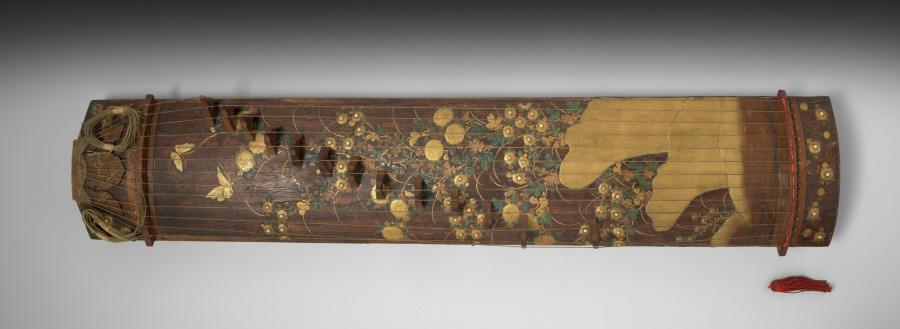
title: Koto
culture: Japan, Edo period (1615–1868)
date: early to mid-1800s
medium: Wood with colored lacquer, sprinkled gold powder (maki-e), glass, textile and cord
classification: Musical Instrument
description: This koto has an elaborately decorated surface, suggesting that it was meant to be admired as a decorative object rather than played as a musical instrument. The vertical design shows a profusion of chrysanthemum and miscanthus grass above a brushwood fence as well as a pair of butterflies.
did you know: The koto descended from the guzheng, a Chinese zither first imported to Japan in the seventh century.